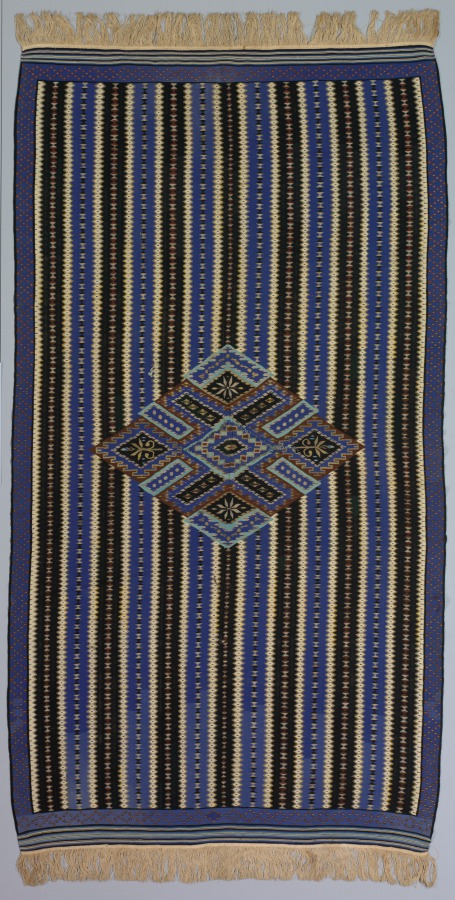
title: Sarape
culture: America, Native North American, Southwest, Mexico, Saltillo, Post-Contact, Early Period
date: c. 1890–1900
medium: tapestry weave: cotton and wool and metal thread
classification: Textile